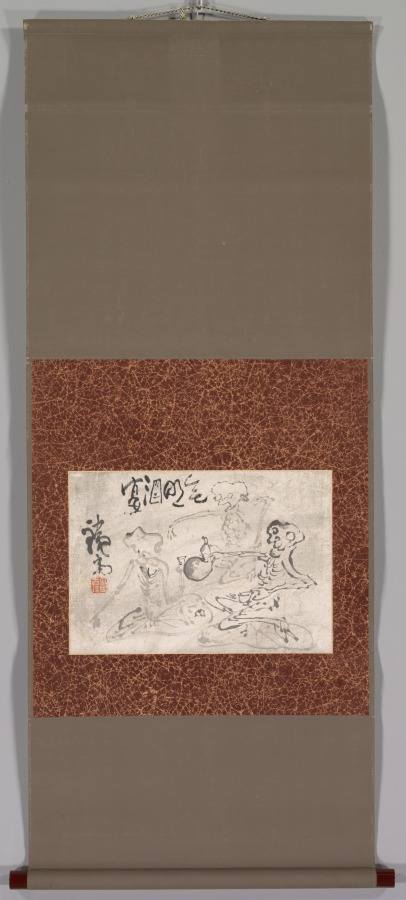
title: Sake Party with No Light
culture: Japan, Meiji period (1868–1912) to Taishō period (1912–26)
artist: Tomioka Tessai (Japanese, 1836–1924)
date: late 1800s–early 1900s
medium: hanging scroll; ink on paper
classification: Painting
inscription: Artist's signature and seal at left side; title at top left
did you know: Three skeletons are holding cups and passing around a bottle of sake.